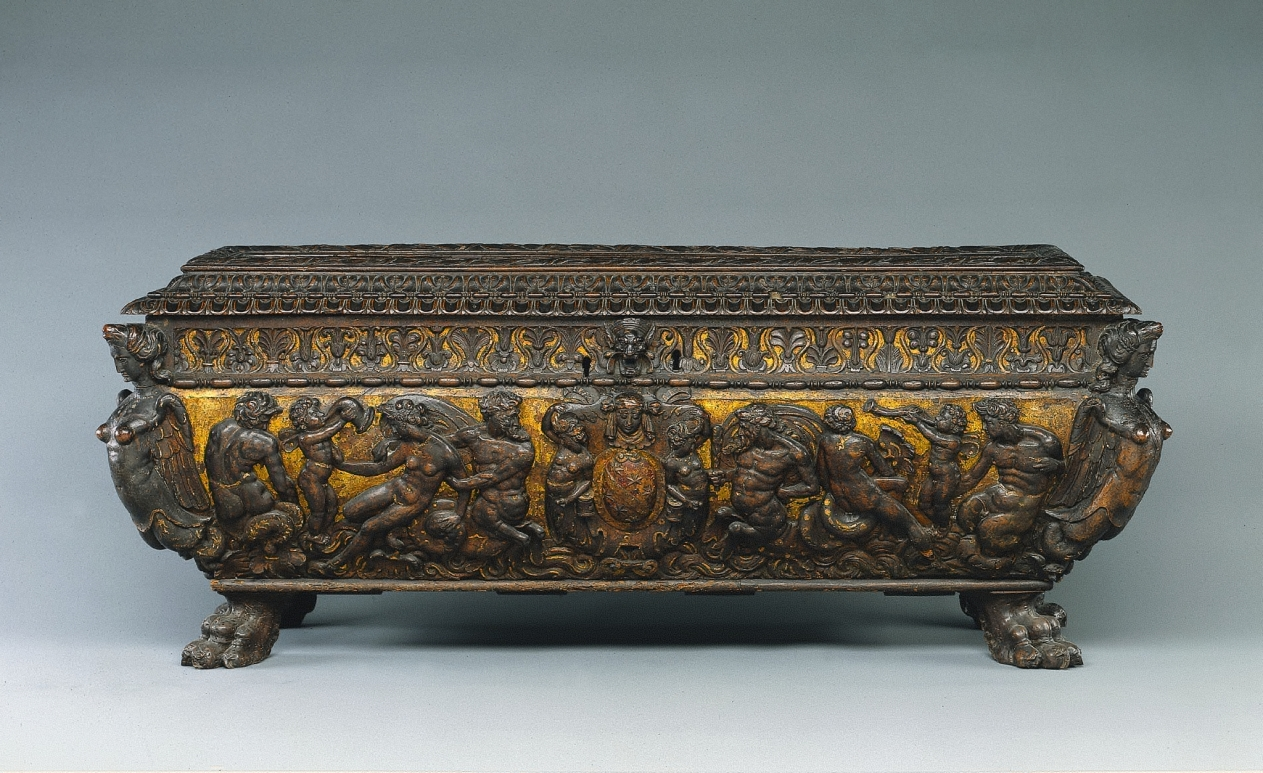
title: Marriage Chest (Cassone)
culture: Italy, Venice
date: mid 1500s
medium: walnut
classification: Furniture and woodwork